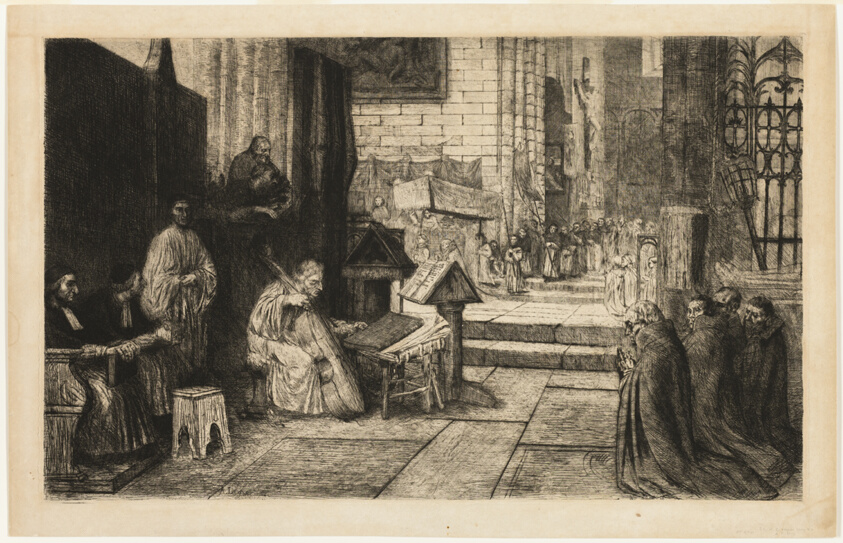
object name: Print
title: Procession in a Spanish Church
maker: Alphonse Legros (French, 1837-1911)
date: c. 1861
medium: Etching on cream wove paper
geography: France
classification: etching; print; prints and drawing